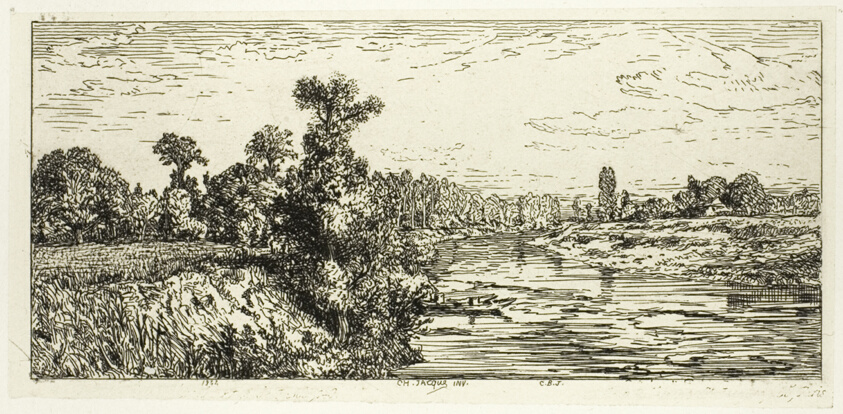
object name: Print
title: The Isle of Aligre, with Two Boats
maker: Charles Émile Jacque (French, 1813-1894)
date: 1844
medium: Etching on ivory China paper laid down on ivory wove paper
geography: France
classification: etching; print; prints and drawing